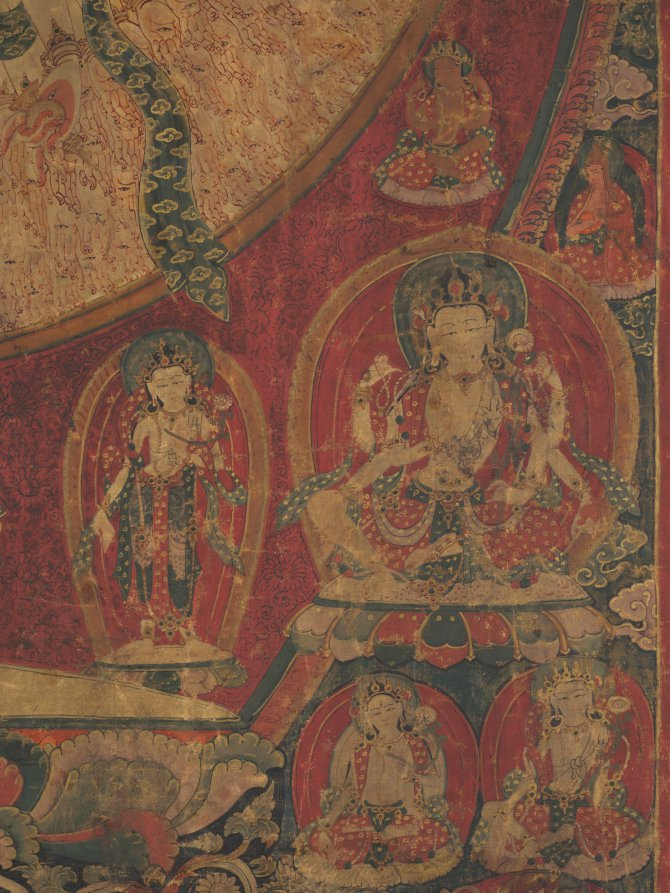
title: Eleven-Headed, Thousand-Armed Bodhisattva of Compassion (Avalokiteshvara)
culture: Western Tibet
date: c. 1500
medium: Gum tempera and ink on cotton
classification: Painting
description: One thousand arms surround the central figure like a radiating halo. Each hand has an eye in the palm to see the suffering of all beings, generating the sense of compassion that this figure embodies. The special form of the central image of the bodhisattva Avalokiteshvara derives from the mystic vision of a nun named Gelongma Palmo, who was born a Kashmiri princess, but prayed for leprosy to avoid having to marry and became an accomplished nun. While meditating in a cave, she achieved this vision of 11-headed, 1,000-armed Avalokiteshvara, who cured her leprosy and guided her on the path to enlightenment.